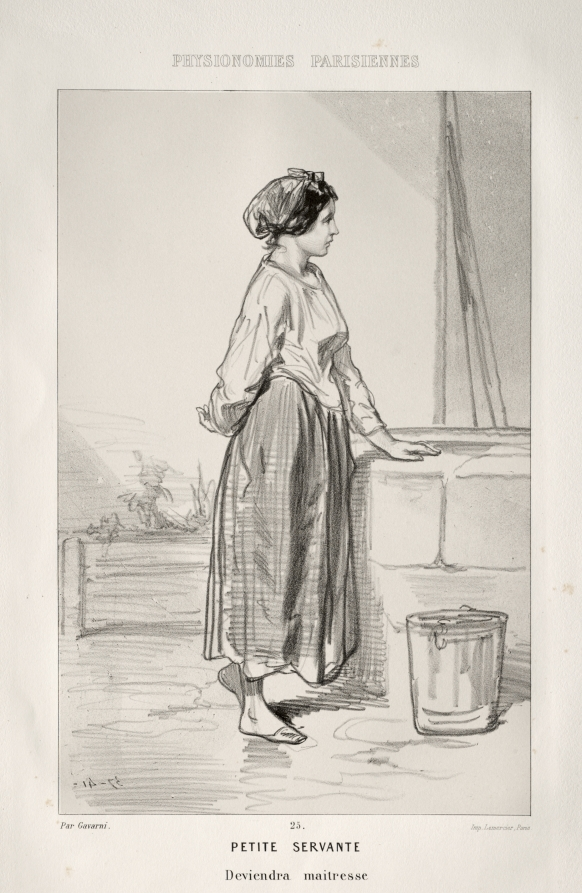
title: Petite Servante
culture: France, 19th century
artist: Paul Gavarni (French, 1804–1866)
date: 1857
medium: lithograph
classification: Print